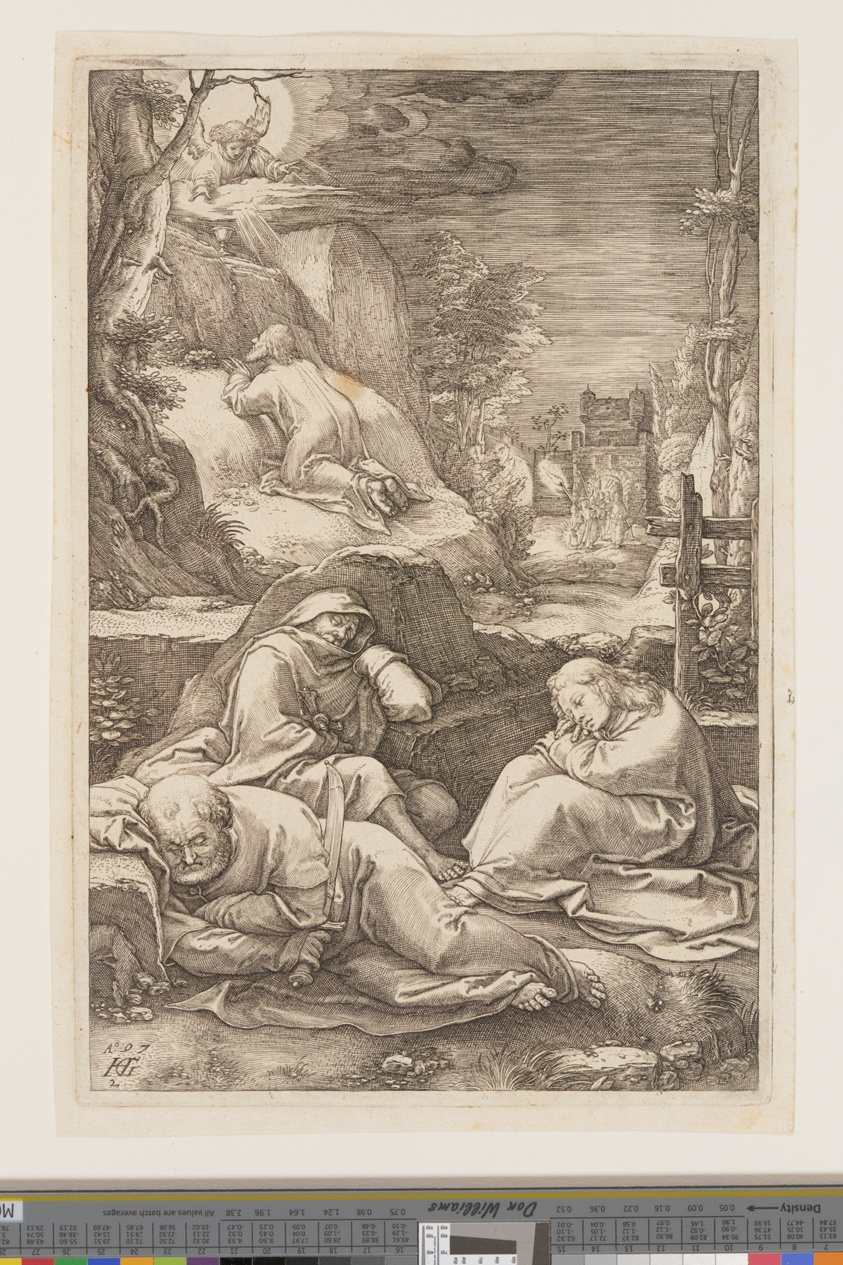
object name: Print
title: Christ on the Mount of Olives, from The Passion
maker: Hendrick Goltzius (Dutch, 1558–1617)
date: 1597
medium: Engraving on ivory laid paper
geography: Netherlands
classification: engraving; paper; print; prints and drawing